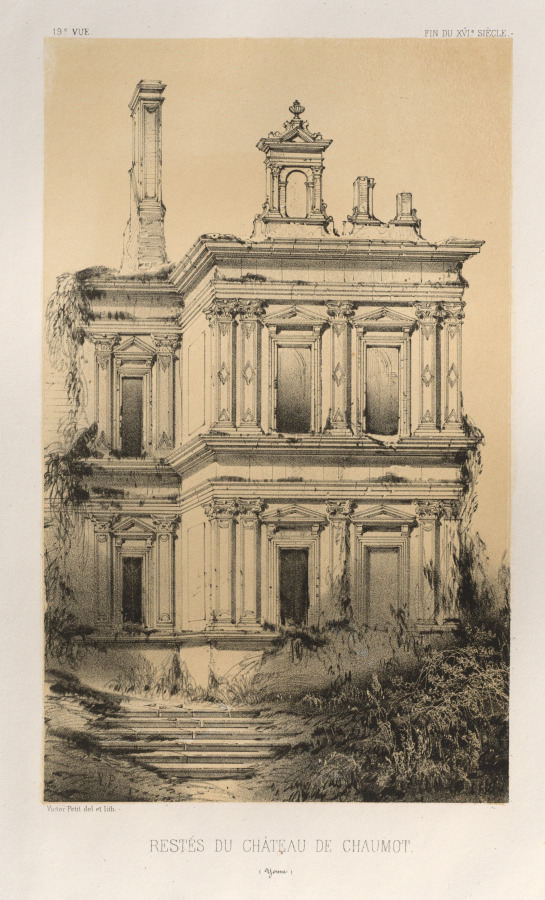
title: Architecture Pittoresque ou Monuments des xveme. Et xvieme. Siecles: Chateaux De France des XV et XVI Siecles: Pl. 19, Restes Du Chateau De Chaumot (Yonne)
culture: France, 19th century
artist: Victor Petit (French, 1817–1874)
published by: Charles Boivin (publisher and editor); Lith de Godard a Paris (printer)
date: 1860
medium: lithograph with tint stone, from portfolio of 100 lithographs with tint stone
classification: Print